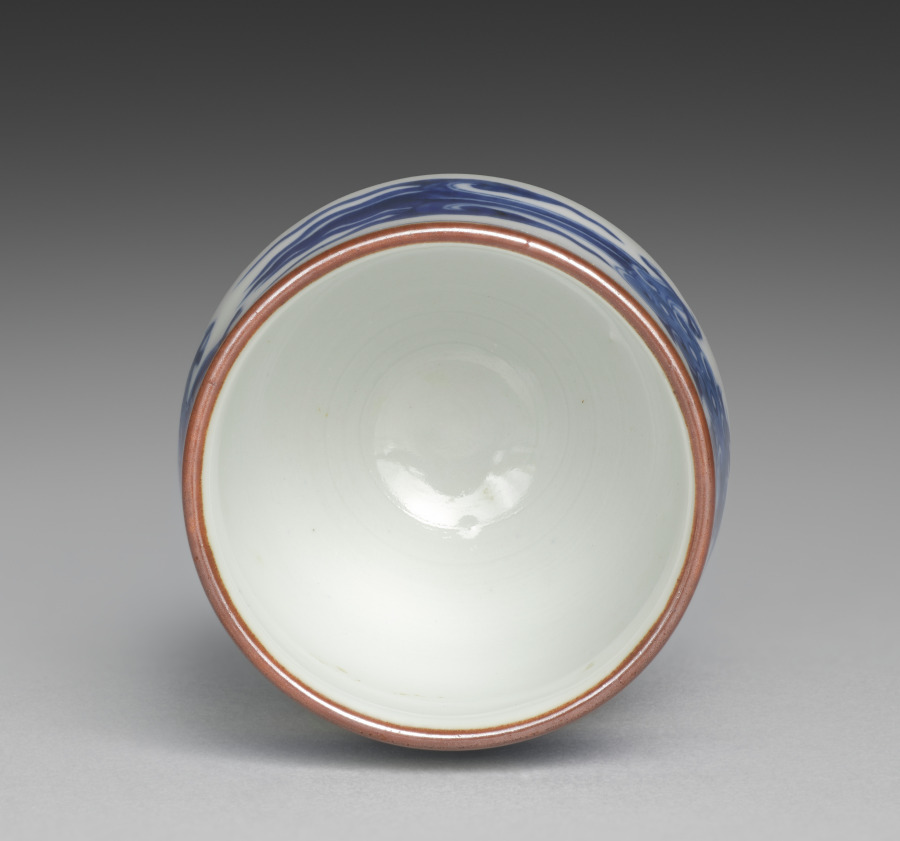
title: Cup from Sake Cups with Dragons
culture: Japan, Meiji period (1868–1912)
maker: Seifū Yohei III (Japanese, 1851–1914)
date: c. 1893–1914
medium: One from a set of six sake cups; porcelain with underglaze blue and iron oxide rims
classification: Ceramic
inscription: 大日本清風造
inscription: 清風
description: Each of these sake cups pictures two backward-looking dragons. The highly stylized creatures resemble jade carvings.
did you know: Seifū Yohei III was inspired by the Chinese mythical animals that were common on porcelain objects made at Jingdezhen in China during the Ming dynasty (1368–1644) and then exported around the world.